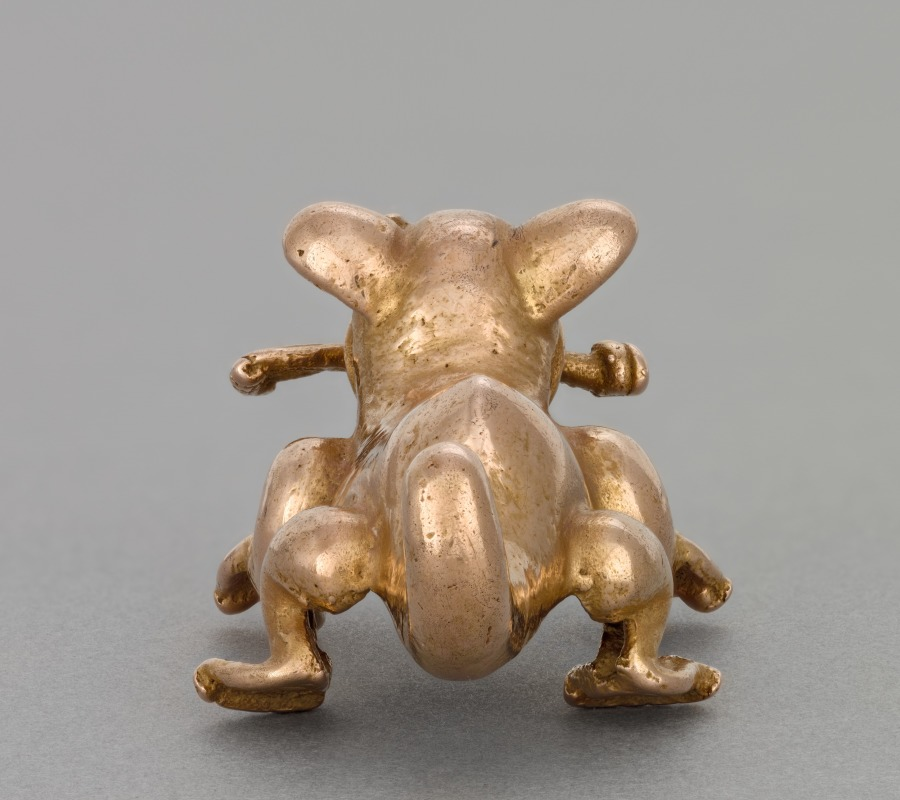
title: Feline Pendant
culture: Isthmian Region, Panama-Costa Rica, Veraguas-Chiriquí style, 11th century-16th century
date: 1000–1550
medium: gold, cast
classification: Metalwork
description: This memorable jaguar pendant is a nasty precious—nasty because it holds a severed limb (probably human) in its fanged mouth but precious due to its material, its well-polished silky surface, and the charming rendering, which reduces the jaguar to cartoon-like essentials. The warm, rosy color is the result of copper in the alloy.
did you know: In the Panama-Costa Rica region gold ornaments were associated with political and religious authority.